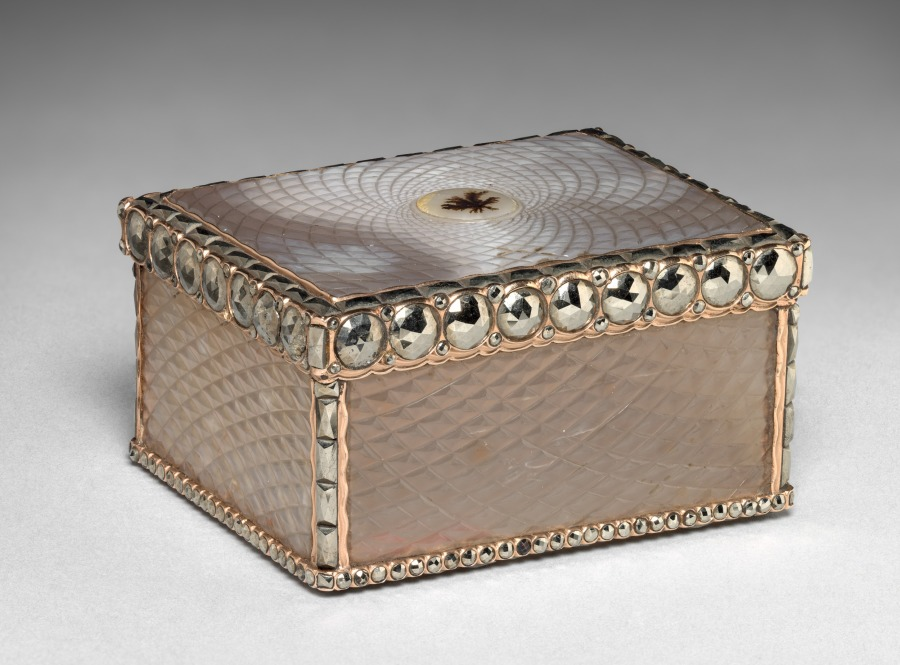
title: Snuff Box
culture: England, London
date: c. 1750–60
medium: gold-mounted agate, engine-turned panels, hematites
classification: Miscellaneous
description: Luxurious personal objects, like this snuff box, were an essential part of a privileged wardrobe during the 1700s and early 1800s, emphasizing their owner’s refinement and wealth. Their glittering surfaces, however, disguised a system based on the labor and suffering of enslaved or indentured people, whether in gold or gemstone mines, tobacco farms, or shops where these goods were made. Like cotton, sugar, and tea, snuff came from British colonies in America, India, and the Caribbean, where enslaved people were exploited to grow these crops under extremely harsh conditions.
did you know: This small, elaborate box held snuff, a form of powdered tobacco that was inhaled in tiny amounts.